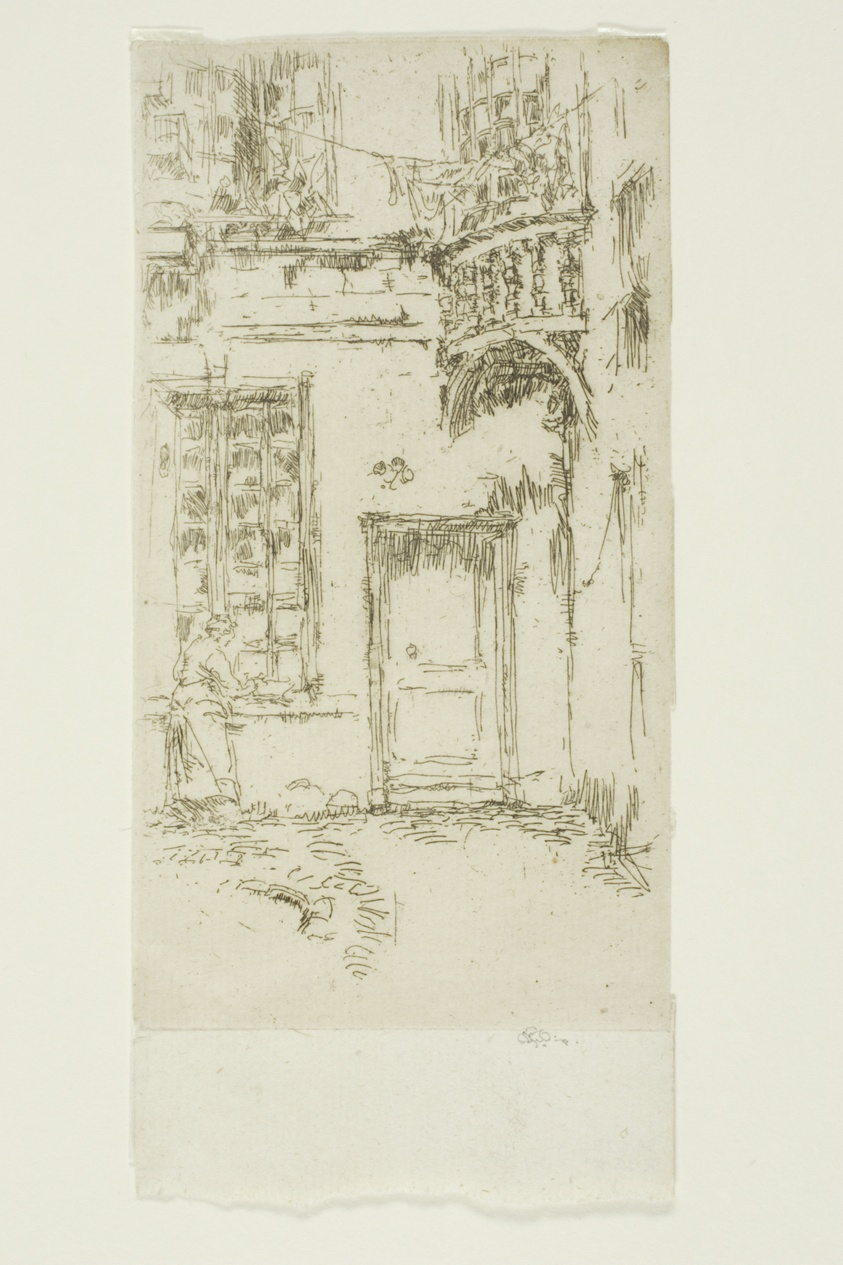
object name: Print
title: Courtyard, Rue P. L. Courier, Tours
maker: James McNeill Whistler (American, 1834-1903)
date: 1888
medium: Etching and drypoint with foul biting in dark brown ink on ivory laid paper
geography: United States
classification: etching; foul biting; print; prints and drawing; paper; drypoint